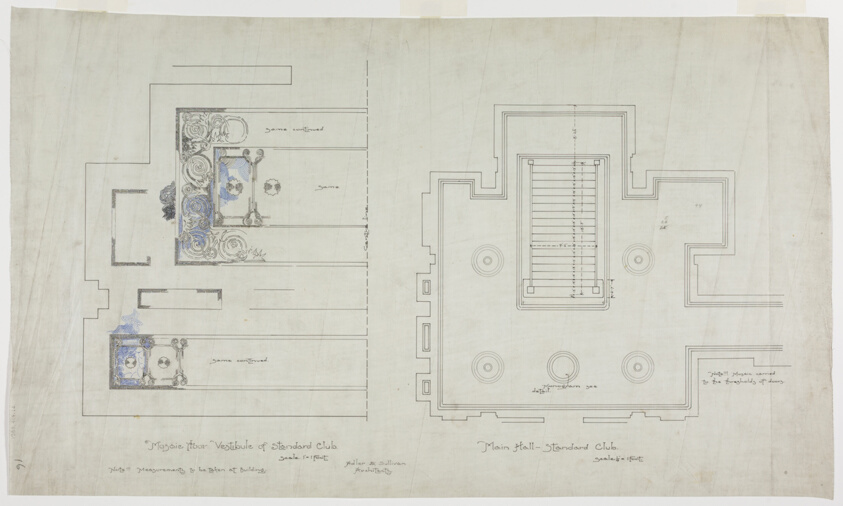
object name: Architectural Drawing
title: Standard Club, Chicago, Illinois, Mosaic Floor for Vestibule and Main Hall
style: 19th century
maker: Adler and Sullivan; American, 1883-1895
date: 1887/88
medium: Graphite and ink on linen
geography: Michigan Avenue at 24th Street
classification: architectural drawing; architectural working drawing; architecture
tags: Chicago, mosaic, architecture, buildings